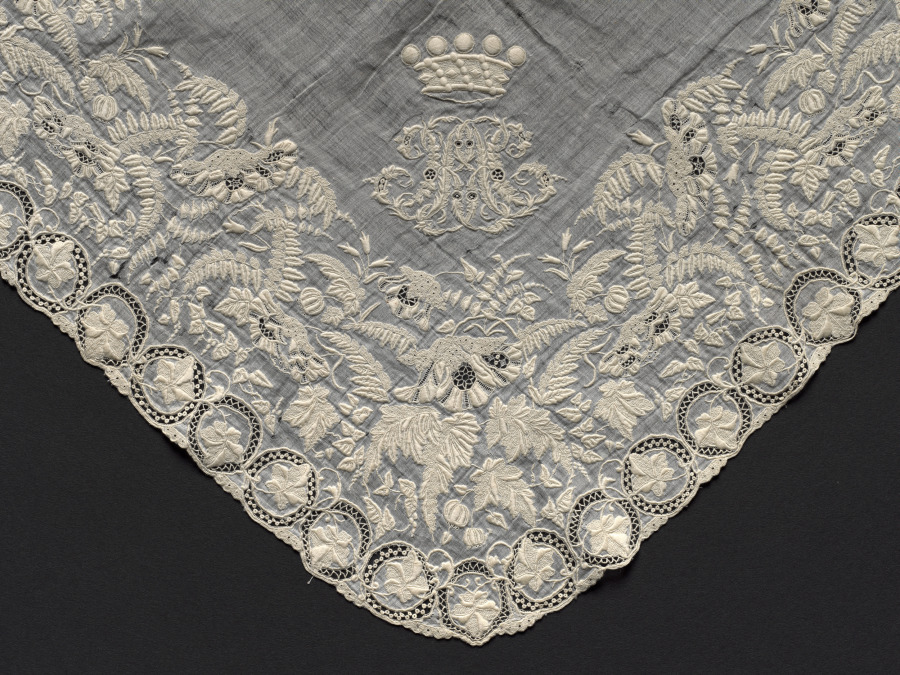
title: Handkerchief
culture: France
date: 1800–1820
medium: linen: embroidery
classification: Embroidery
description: Initials and a coronet are embroidered in one corner of this handkerchief.